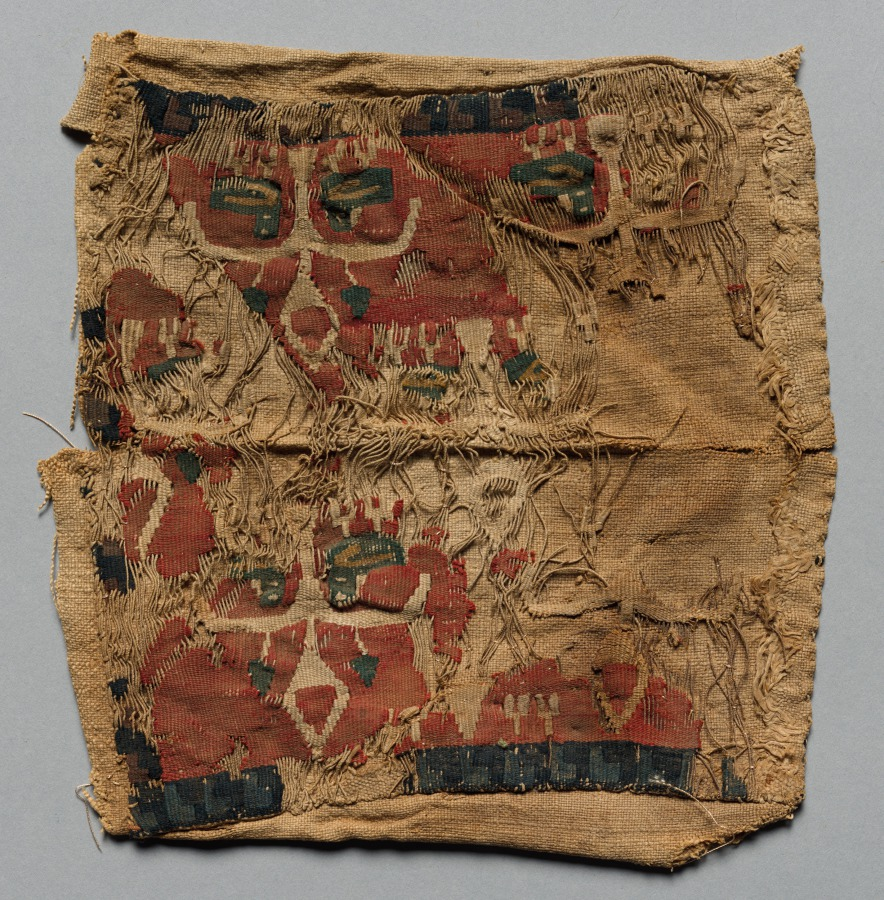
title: Fragment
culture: Egypt, Byzantine period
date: 500s - 700s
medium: tapestry weave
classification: Textile